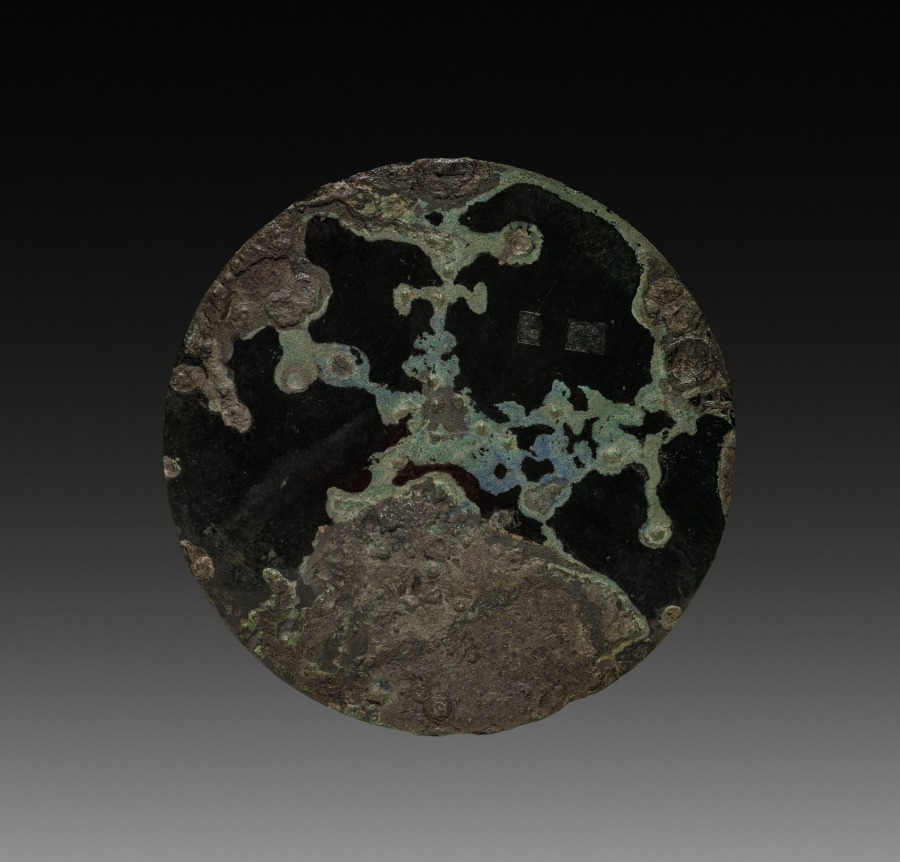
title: Mirror with 'Shan' (Mountain) Pattern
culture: China, probably State of Chu, possibly Hunan province, Eastern Zhou dynasty (770–256 BCE), Warring States period (475–221 BCE)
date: 200s BCE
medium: bronze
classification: Metalwork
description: Chinese mirror-casting achieved new elegance and precision with the technical development of stamped clay molds over which molten bronze was poured. A small rectangular unit of design was repeatedly stamped to create this background of curls and granulation, which resembles feather-covered textiles known from early tomb finds. The dominant pattern of slanting "T," pressed down upon the mold after the overall background stamps, corresponds to the modern Chinese character for shan (山 or mountain). Whether the pattern was symbolic or decorative during the Zhou Dynasty is unknown. The site of manufacture is probably south China, since many mirrors of this type have been excavated from tombs in that area.